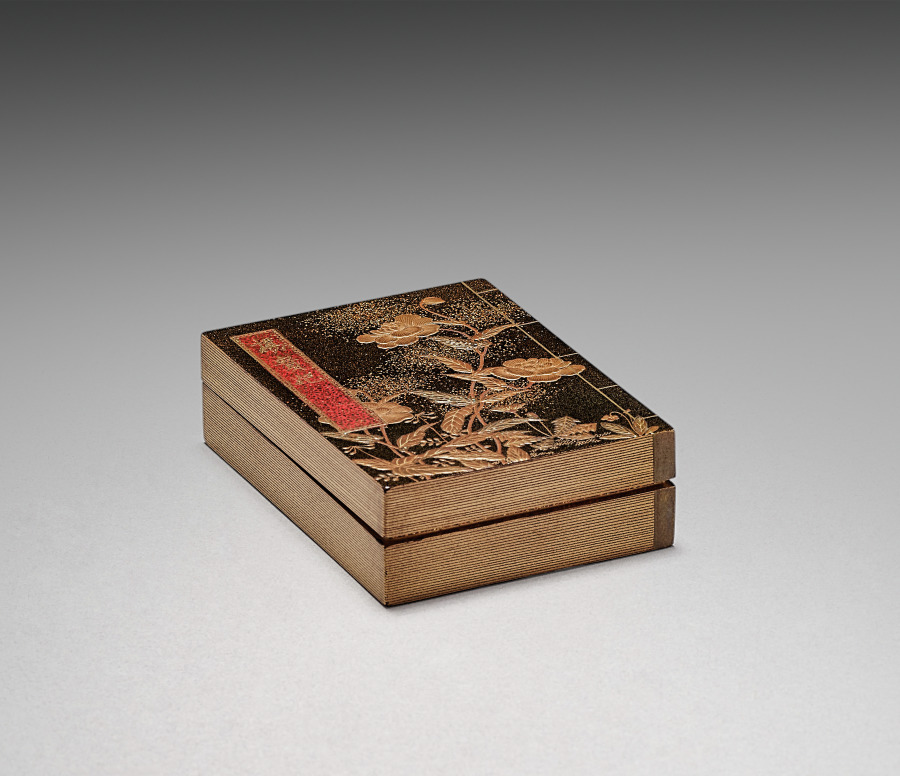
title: Nested Boxes with Chrysanthemums (inner box)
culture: Japan, Meiji period (1868–1912)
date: early 1900s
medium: lacquer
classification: Lacquer